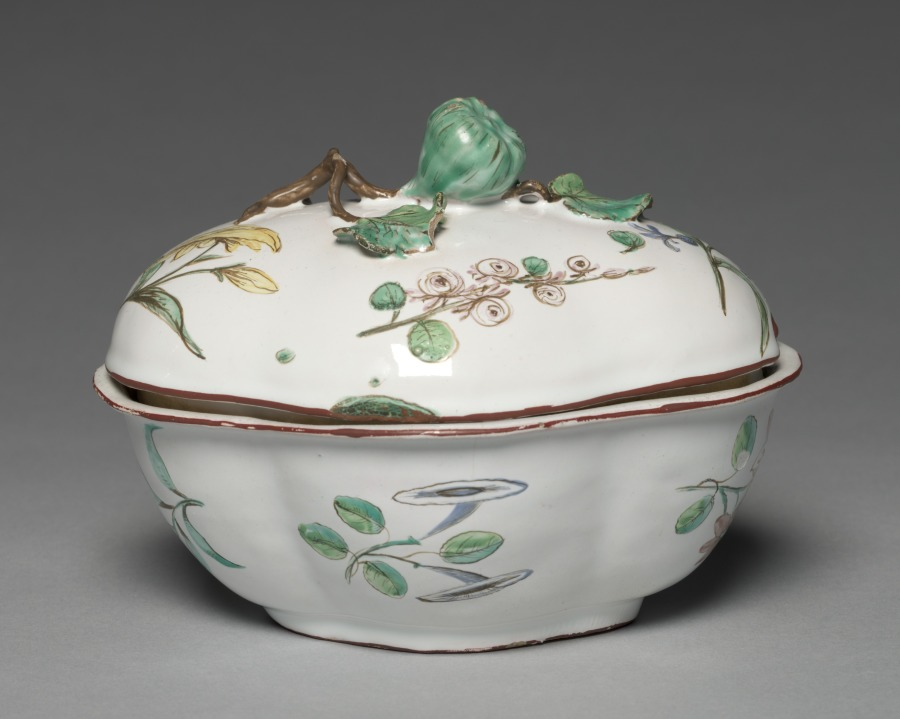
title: Sugar Basin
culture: France, 18th century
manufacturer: Sceaux Factory (French, active 1748–66)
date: c. 1750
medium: faience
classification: Ceramic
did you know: In medieval Italian churches, painted altarpieces served as a focal point for worshippers during the rituals of faith. The figures of Jesus, Mary, and eight saints are framed by a golden background that would have glistened in the flickering candlelight of the church.